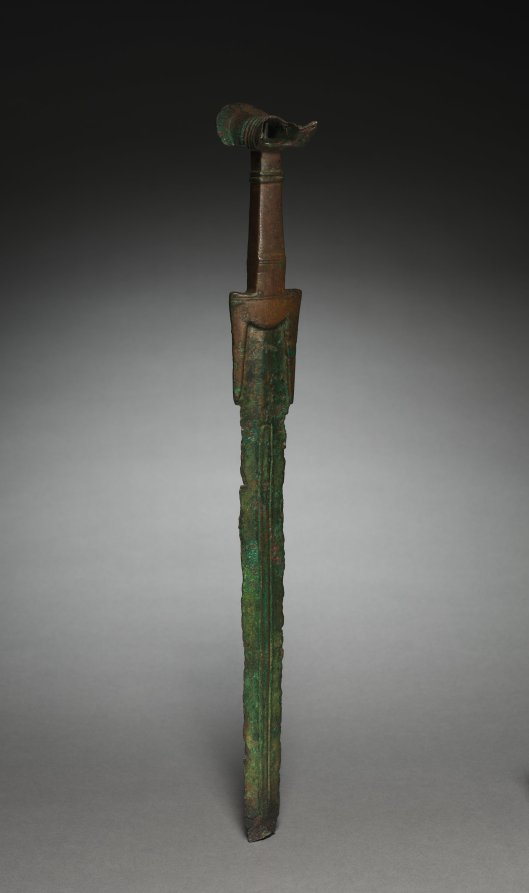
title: Sword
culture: Iran, Luristan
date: 2000–1000 BCE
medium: bronze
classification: Arms and Armor